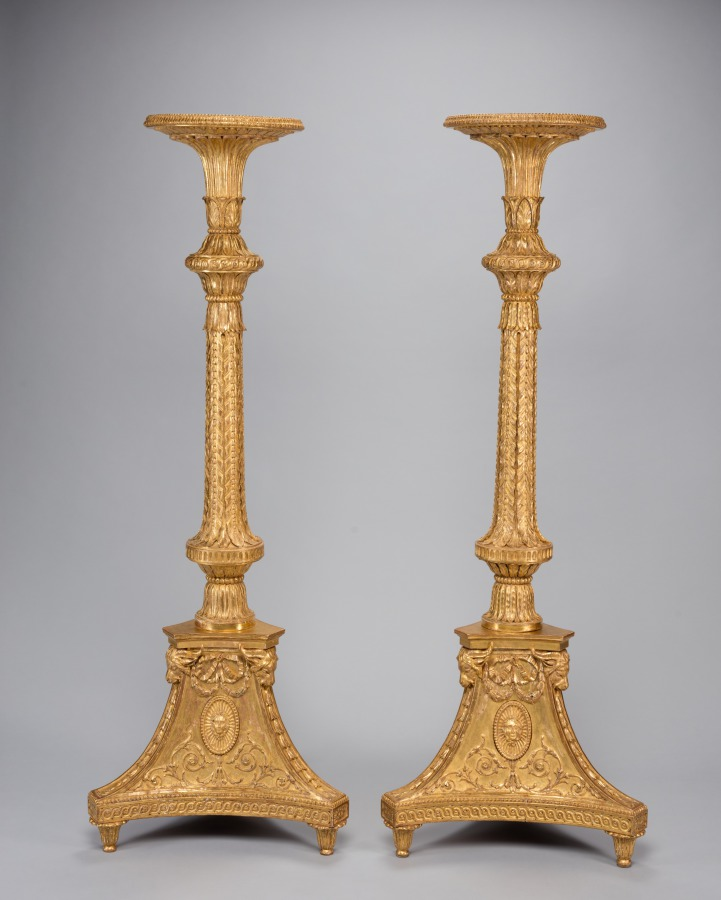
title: Pair of Candle Stands (torchères)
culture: England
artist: Thomas Chippendale (British, 1718–1779)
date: c. 1773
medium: Gilt-wood, gesso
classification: Furniture and woodwork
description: This pair of gilded candle stands was made by Thomas Chippendale, the most renowned cabinetmaker in eighteenth-century London, for the grand drawing room of Brocket Hall, a large country house in Hertfordshire, England. With finely carved acanthus leaves, swags, fluting, and oval masks depicting the Roman goddess Diana, these candle stands exhibit Chippendale’s masterful understanding of neoclassical proportion, scale, and ornament. His landmark book of furniture designs, The Gentleman and Cabinet-Maker’s Director (first published in 1754), was highly admired as a source of inspiration by cabinetmakers and architects around England as well as in Europe and America.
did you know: Candle stands usually held silver or crystal candelabra that were lit for evening entertainment.